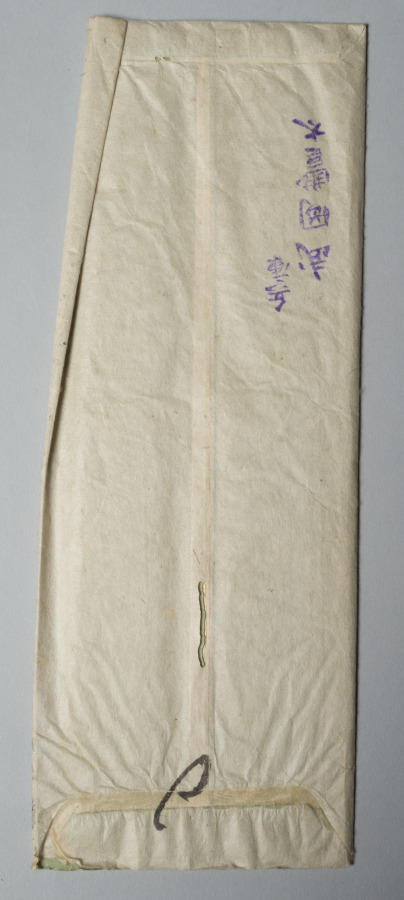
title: Courtesan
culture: Japan, Edo period (1615–1868)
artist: Matsuno Chikanobu (Japanese, active 1716–35)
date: 1716–35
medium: hanging scroll; ink and color on paper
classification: Painting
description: A glamorous courtesan sports an outer robe decorated with large roundels featuring plant motifs including iris and bush clover. Little is known about the life and artistic training of the painter Matsuno Chikanobu, an ukiyo-e artist who painted in a style strongly reminiscent of that of the Kaigetsudō studio. Many of his known paintings are on silk, and executed with high quality pigments, indicating that his primary clientele were wealthy individuals.